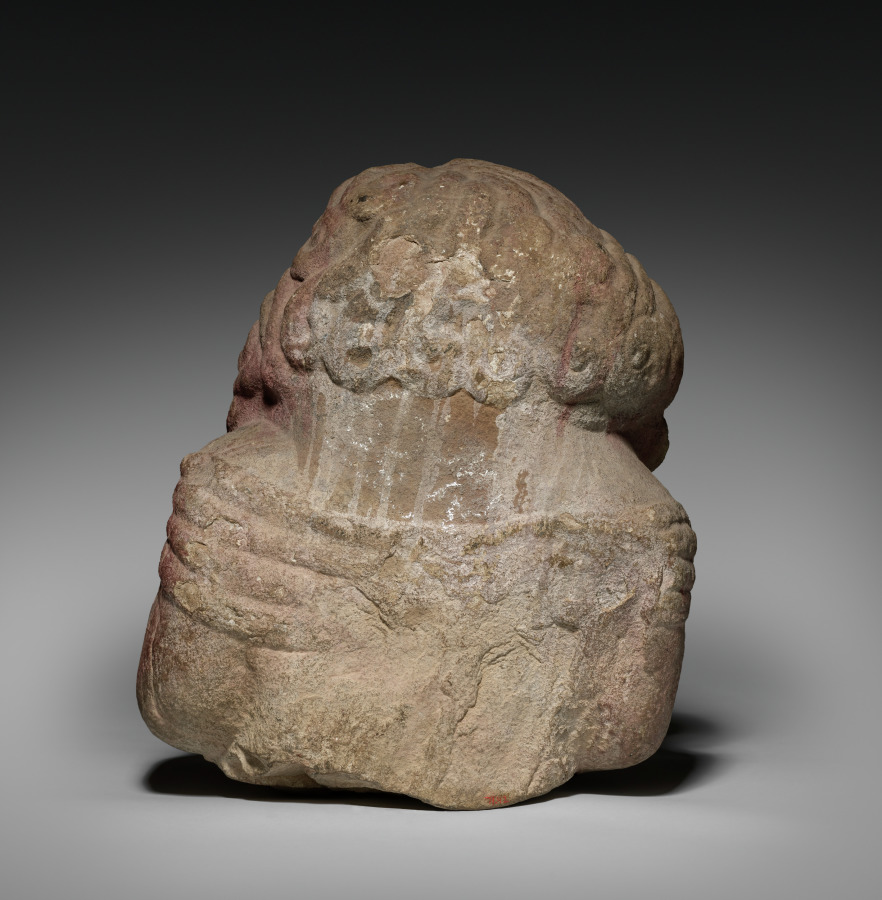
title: Shivagana Blowing Conch Shell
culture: India, Sarnath, Gupta Period, 5th Century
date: c. 400s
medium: stone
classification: Sculpture